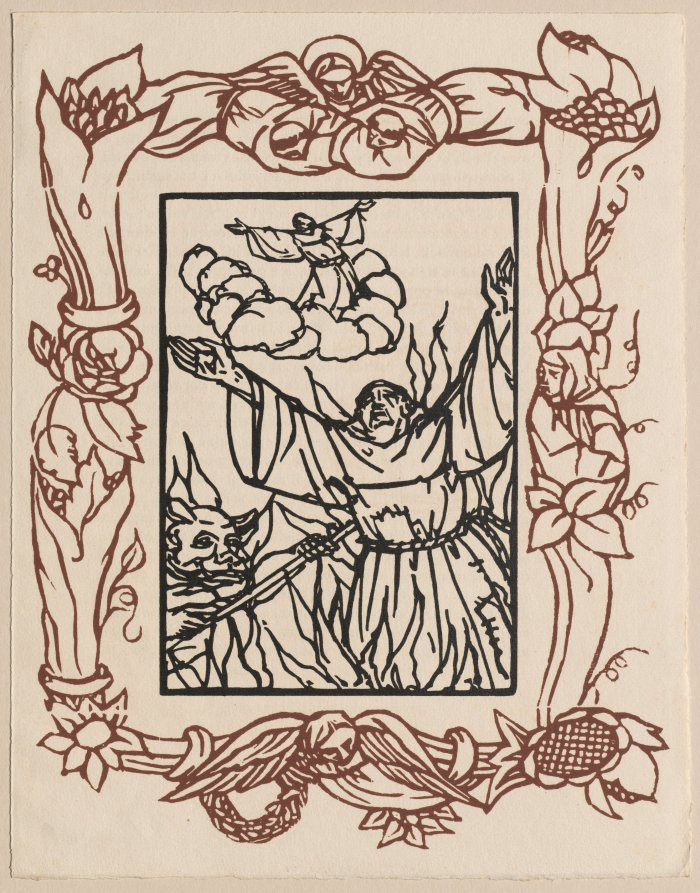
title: Small Flowers of Saint Francis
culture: France, 20th century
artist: Émile Bernard (French, 1868–1941)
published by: Ambroise Vollard (French, 1867–1939)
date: 1928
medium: color woodcut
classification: Print